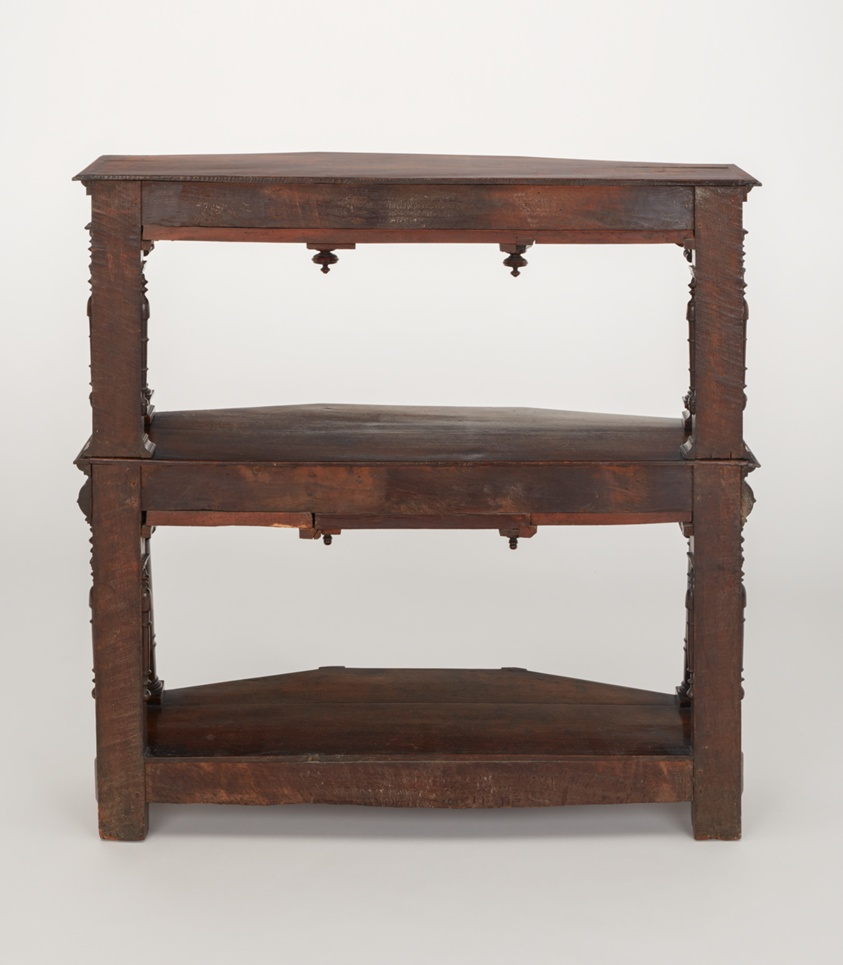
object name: Furniture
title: Court Cupboard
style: Mannerism, 17th Century, Baroque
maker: England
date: c. 1660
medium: Oak and iron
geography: England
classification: furniture; cupboard; decorative arts; european decorative arts; furnishings; Ionic; architectural detail; sideboard (furniture); woodwork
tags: display, banquet, Buffet, cupboard, England, English